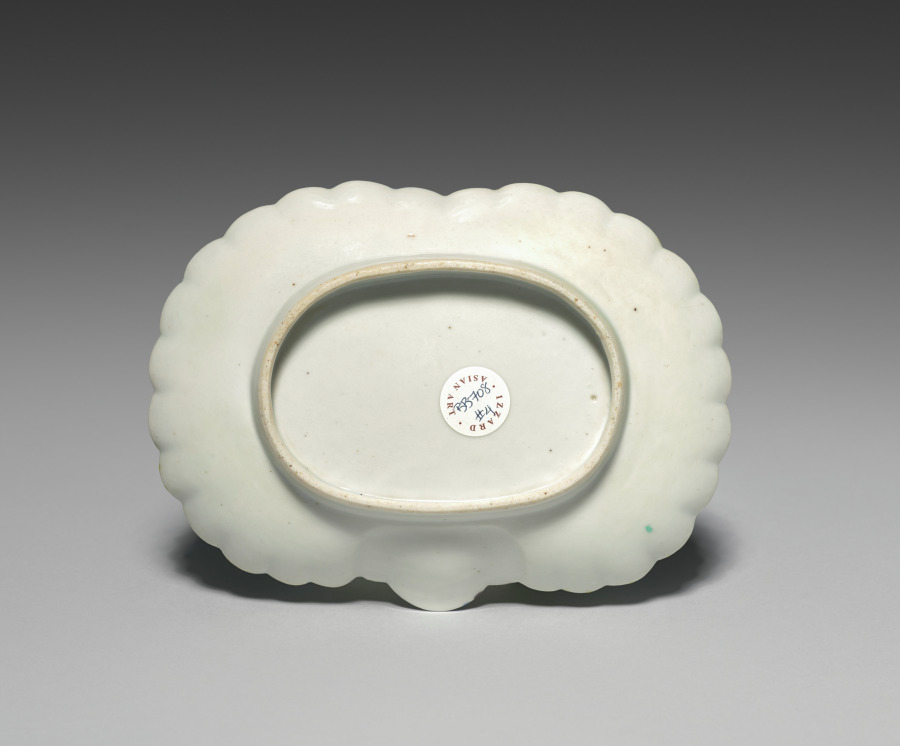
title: Ginkgo Leaf-Shaped Small Dish (Kozara) with Stylized Key-Fret Design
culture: Japan, Edo period (1615–1868)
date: mid-1600s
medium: Porcelain with molding and overglaze color enamel (Hizen ware, Matsugatani kilns, Nabeshima type)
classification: Ceramic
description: This dish combines a precisely molded shape with a freehand design in overglaze color enamels.